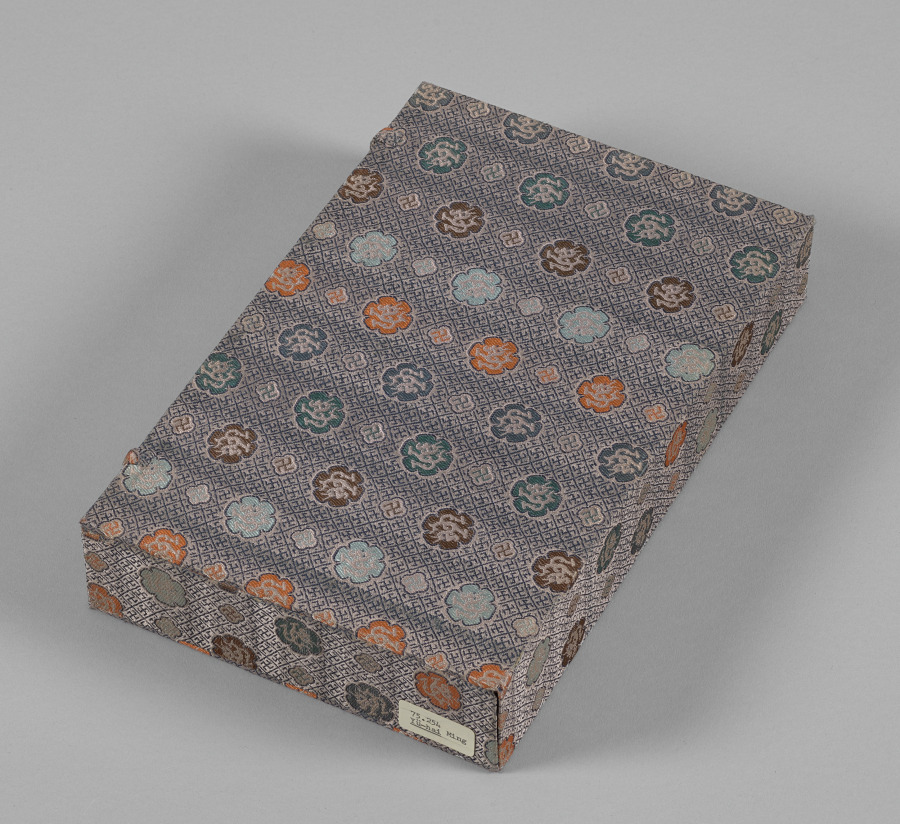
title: Yu-hai (Ocean of Jade) woodblock bound volume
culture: China, Ming dynasty (1368–1644)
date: 1368–1644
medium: woodblock-printed book with painted edges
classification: Bound Volume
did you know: When each book is rolled to form a cylinder, a landscape appears on the edges, painted in ink and washes of color.